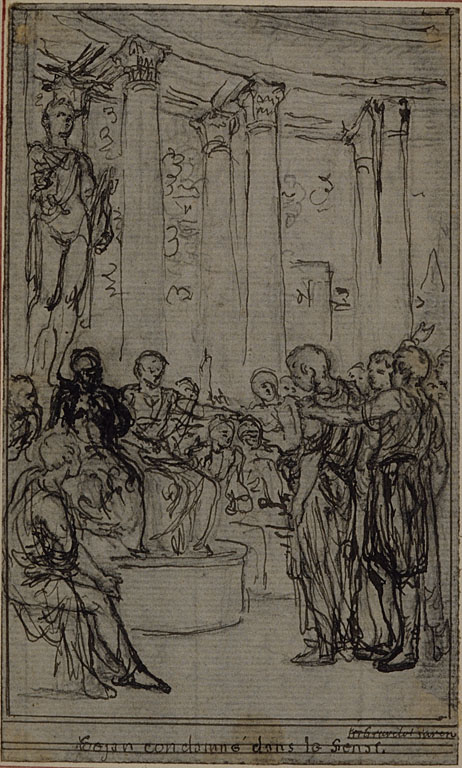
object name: Drawing and Watercolor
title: Study for an illustration in Tacitus "Tibère, ou Les Six Premiers Livres des Annales", Book V, Vol. 3, 1st Study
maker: Hubert François Gravelot (French, 1699-1773)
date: c. 1768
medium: Pen and black ink, over graphite, on gray laid paper, incised for transfer and perimeter mounted on ivory laid paper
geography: France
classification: pen and ink drawings; drawings (visual works); prints and drawing